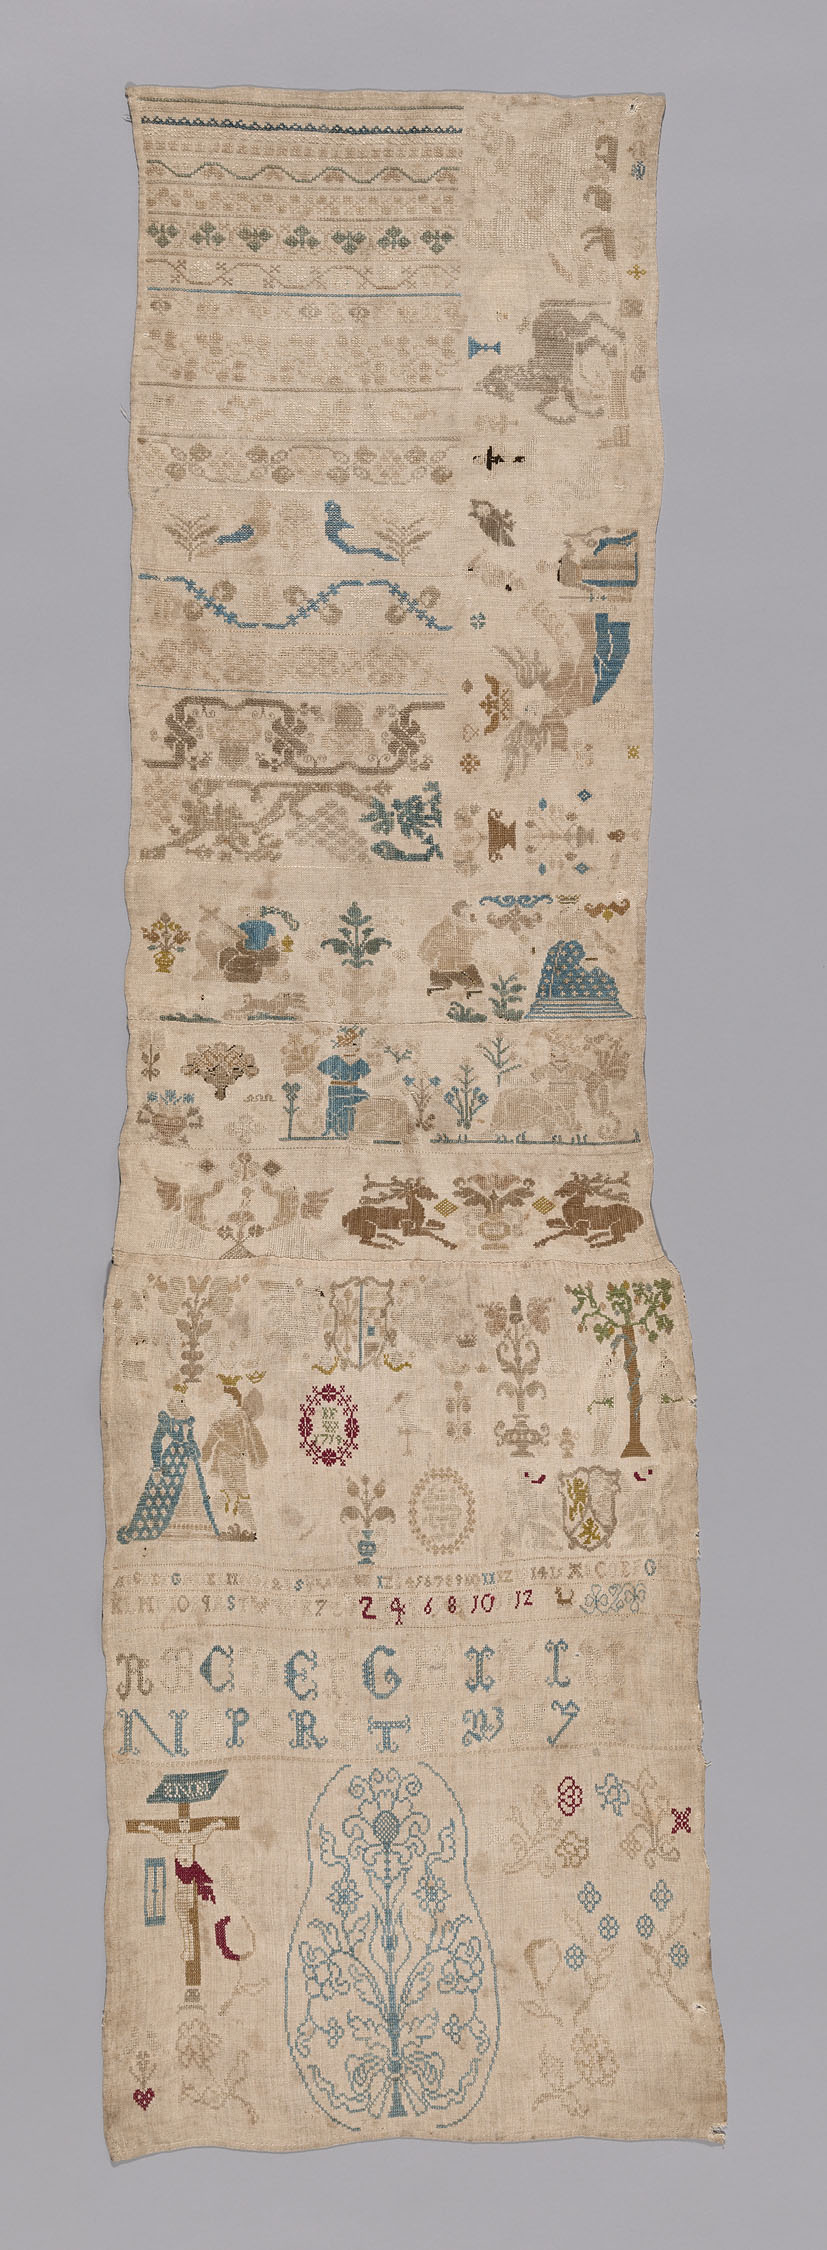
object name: Textile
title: Sampler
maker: Germany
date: 1719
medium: Linen, plain weave; embroidered with linen and silk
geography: Germany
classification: textile; sampler; needlework (visual works)